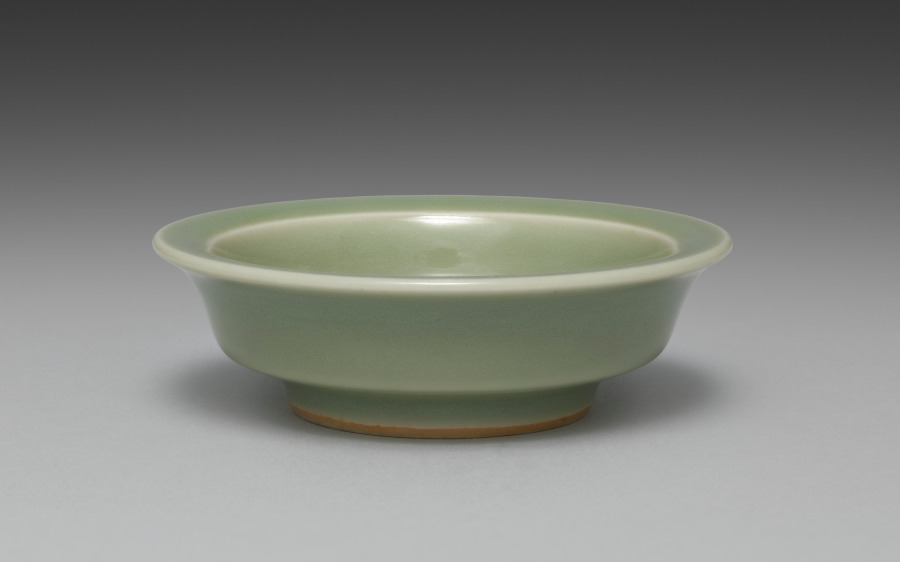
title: Saucer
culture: Japan, Meiji period (1868–1912)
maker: Seifū Yohei III (Japanese, 1851–1914)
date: 1893–1914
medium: One from a set of ten dishes; porcelain with green glaze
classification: Ceramic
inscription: 清風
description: Yohei III’s main output for his sophisticated clientele was in the form of tea sets and dining sets. He created a range of dishes in green glazes. He often produced in pairs, sets of five, or sets of ten. For this set of ten small dishes in a simple, round form that emphasizes the glaze above all, the box lid designates the piece as seiji, or green-glazed porcelain, using a general term for the extensive palette of green glazes often called celadon in English. The box lid further identifies the dishes themselves as tōchō, literally “bean-sized saucers,” a size that makes them suitable for dipping sauces.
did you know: The ten dishes in this set are stored in stacks of five in a two-compartment box.